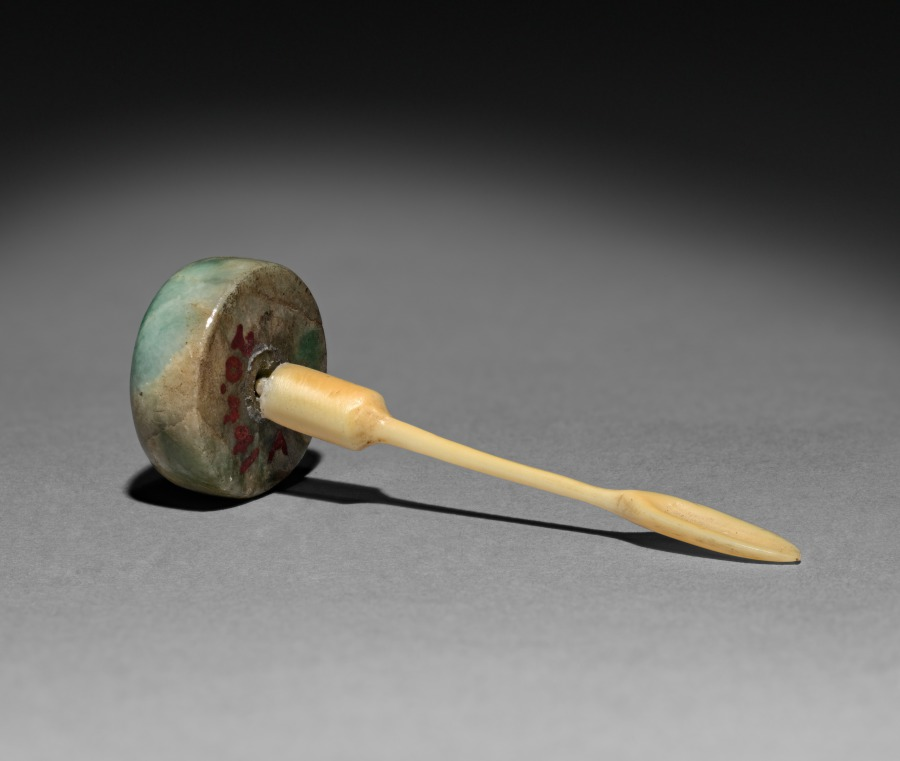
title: Snuff Bottle (stopper)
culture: China, Qing dynasty (1644-1911)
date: 1644–1911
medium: glass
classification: Glass